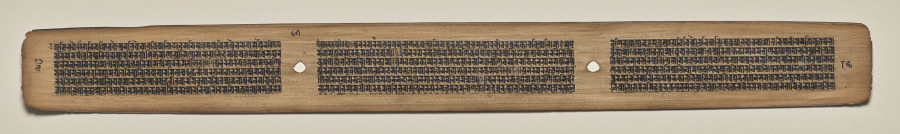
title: Text, Folio 85 (verso), from a Manuscript of the Perfection of Wisdom in Eight Thousand Lines (Ashtasahasrika Prajnaparamita-sutra)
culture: Eastern India, Bihar, Vikramashila Monastery. Painting: Nepal, Kathmandu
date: Sunday, September 14, 1119 (year 239 of the Newar Samvat in the month of Ashvina)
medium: gum tempera and ink on palm leaves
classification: Painting